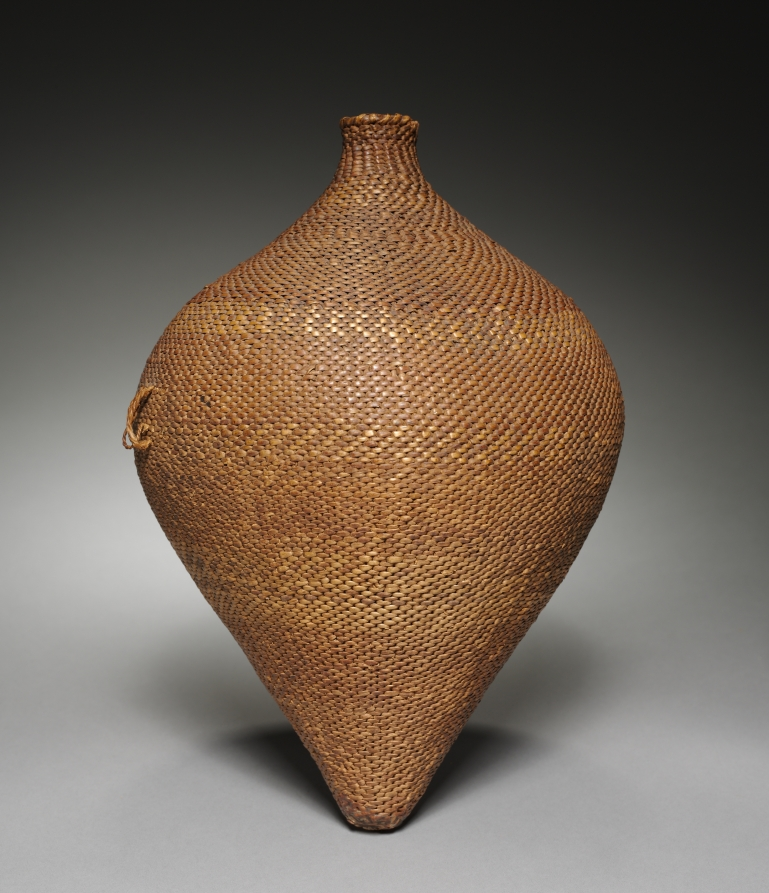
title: Seed Storage Jar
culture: Great Basin, Paiute, Kern County, Unassigned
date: Unassigned, before 1917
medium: peeled and unpeeled willow, diagonal twine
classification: Basketry